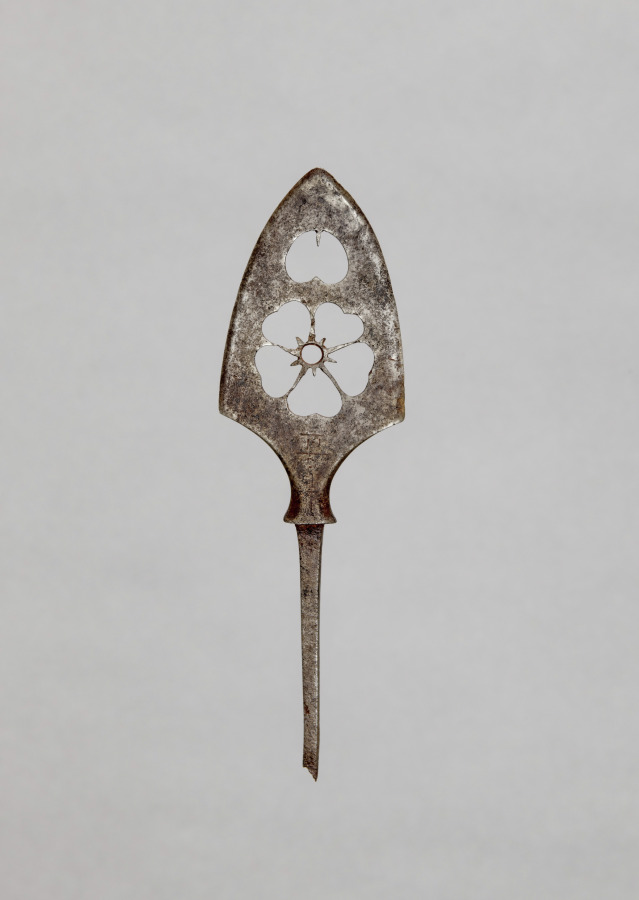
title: Arrow Point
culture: Japan, Edo period (1615–1868)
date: 1700s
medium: steel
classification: Arms and Armor